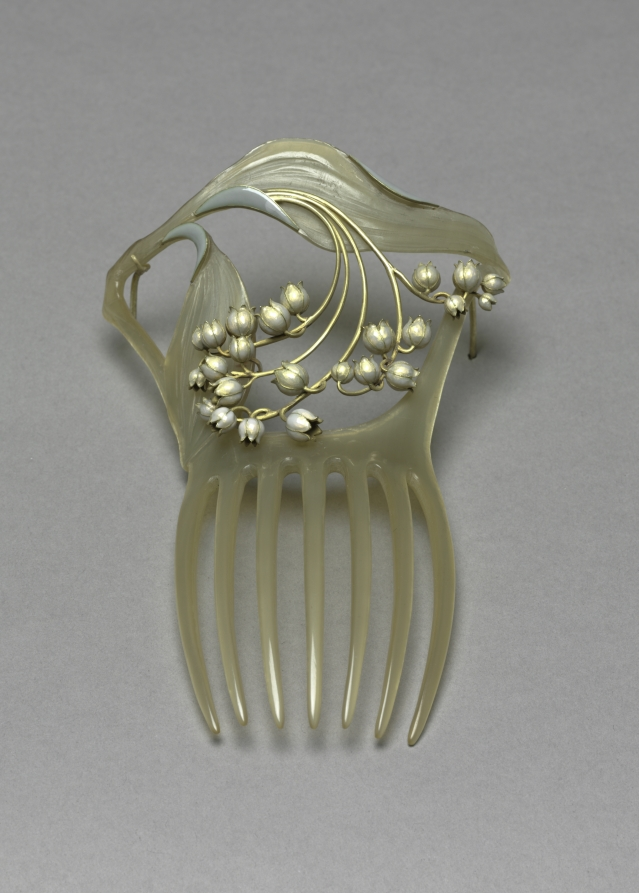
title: Lily of the Valley Comb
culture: France, early 20th Century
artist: René Lalique (French, 1860–1945)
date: c. 1900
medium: horn, enamel and gold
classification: Jewelry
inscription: Engraved on side of gold stem: "LALIQUE"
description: This comb was purchased by Cleveland native Jeptha Homer Wade II from Lalique after admiring the designer's work at the 1900 Exposition Universelle in Paris, probably for his wife Ellen Garretson Wade. Pearlescent horn forms the leaves of the lily of the valley, out of which the delicate, bell-shaped enamel flowers emerge.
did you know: Lalique valued the use of horn for its transparent qualities and natural color.